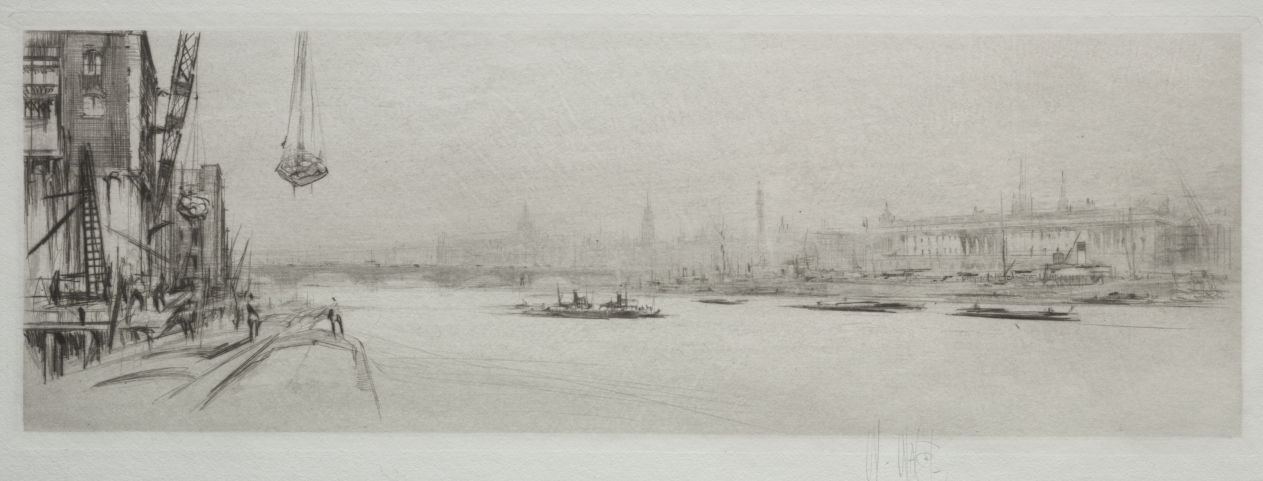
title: Arteries of Great Britain: The Thames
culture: England, 20th century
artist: William Walcot (British, 1874–1943)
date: 1922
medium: drypoint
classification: Print